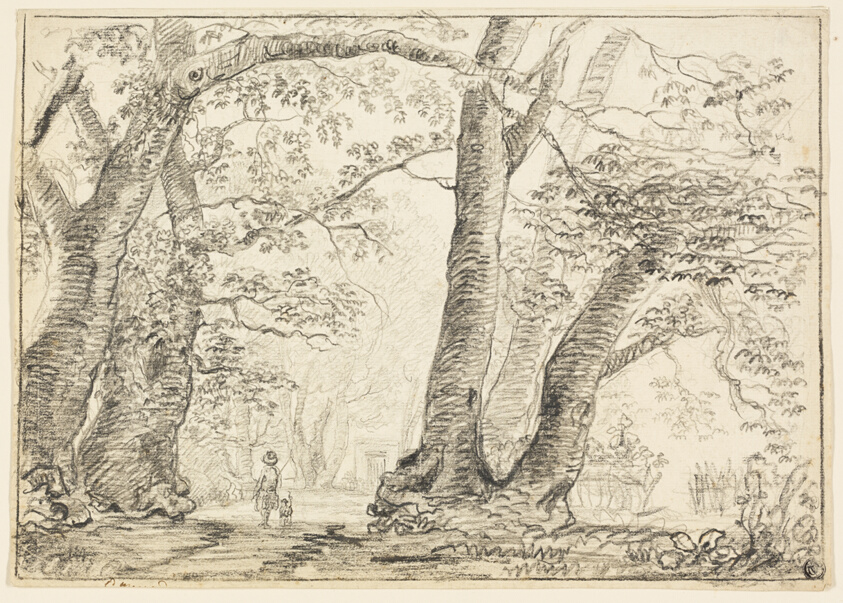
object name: Drawing and Watercolor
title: Man with Dog in Forest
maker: Unknown Artist; probably English, 18th century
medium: Black crayon on ivory laid paper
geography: England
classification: chalk; drawings (visual works); prints and drawing